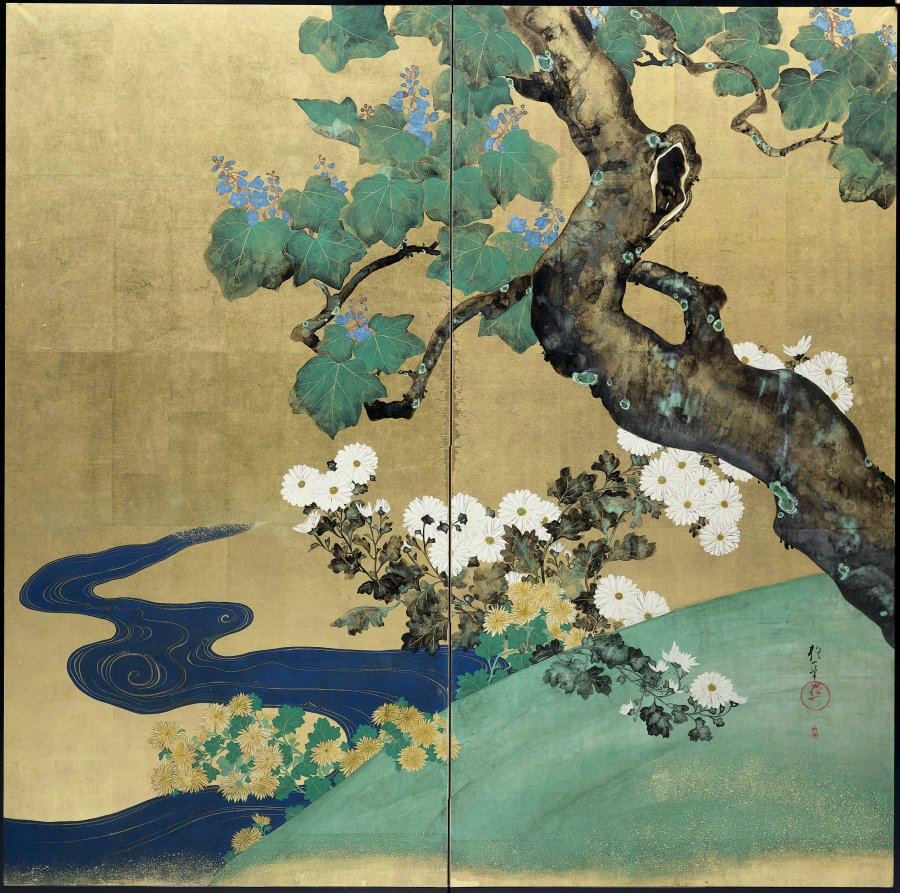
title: Paulownias and Chrysanthemums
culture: Japan, Edo period (1615–1868)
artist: Sakai Hōitsu (Japanese, 1761–1828)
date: early 1800s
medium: Two-panel folding screen; ink and color on gilded paper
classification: Painting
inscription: inscription at right reads: "Hoitsu hitsu" (painted by Hoitsu); within circle: (Hoitsu); tiny gourd shape below encloses two characters "Bun-zen," Hoitsu's name.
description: In this screen, Sakai Hōitsu expertly deployed a painting technique called “dripping-in” (tarashikomi). Ink and color dripped on the surface, and allowed to pool there, created the illusionistic effect of lichen-dotted tree bark and twisted chrysanthemum leaves. Paulownia and chrysanthemum are signifiers of late spring and early autumn as well as emblems of the Japanese imperial house. Paulownia also has medicinal properties and associations with fortitude, while chrysanthemum symbolizes good government.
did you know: Hōitsu often painted two-panel folding screens for urban clients residing in smaller spaces. A painting after this one in the Itabashi Museum in Tokyo shows an extended composition across a pair of two-panel screens.